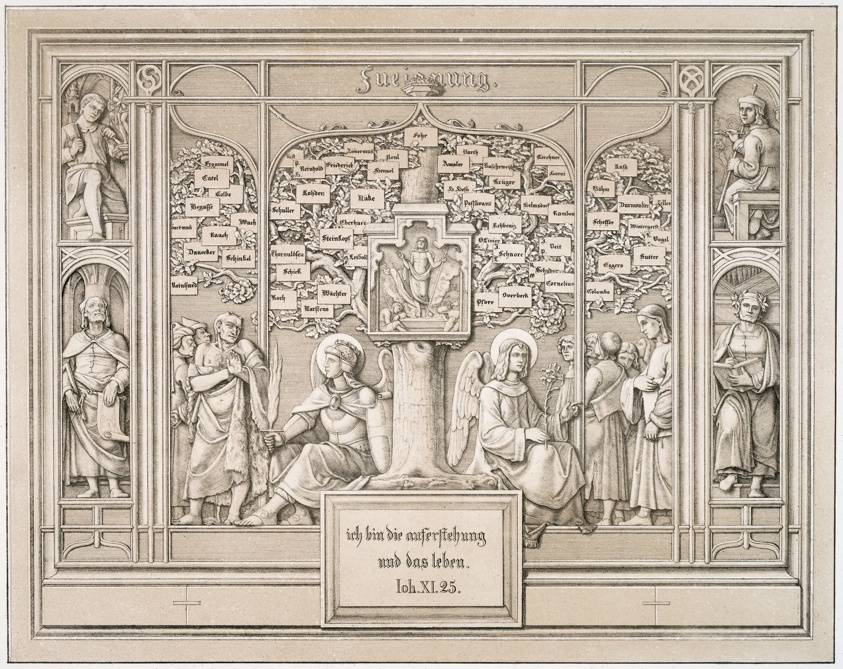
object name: Print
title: Dedication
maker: Ferdinand Olivier (German, 1785-1841)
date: 1823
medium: Lithograph in brown and black ink on ivory wove paper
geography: Germany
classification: lithograph; print; prints and drawing